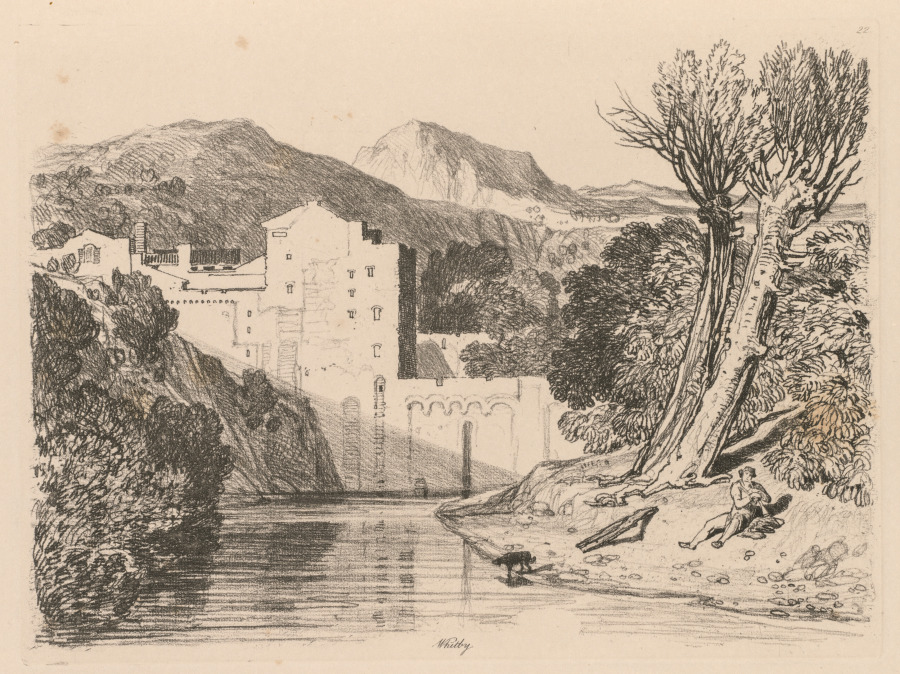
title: Liber Studiorum: Plate 22, Whitby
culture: England, 19th century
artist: John Sell Cotman (British, 1782–1842)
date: 1838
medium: softground etching, from a bound volume containing 48 plates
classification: Bound Volume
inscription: In plate, within image, upper right: 22; in plate, below image: Whitby